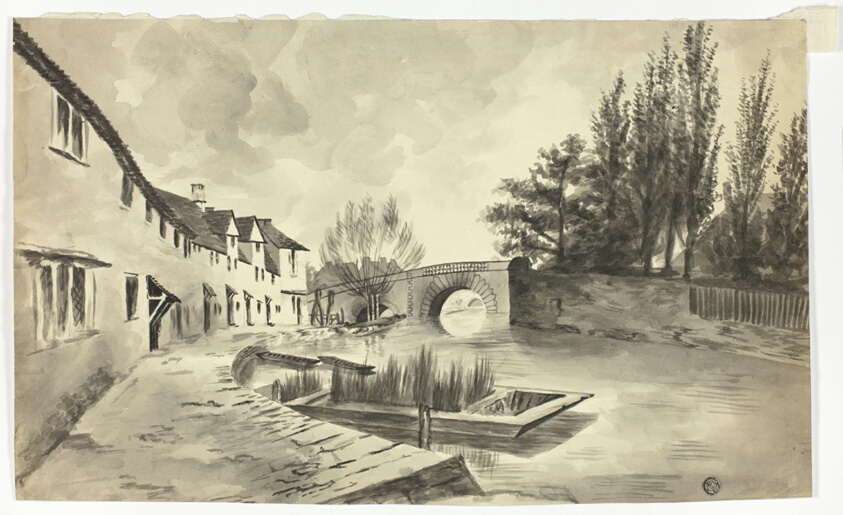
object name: Drawing and Watercolor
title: Fisher Row and the Bridge over the River on the New Road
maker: Unknown Artist; British, 19th century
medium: Brush and black ink, with brush and gray wash, on ivory wove paper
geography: United Kingdom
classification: drawings (visual works); brush and ink; paper; prints and drawing